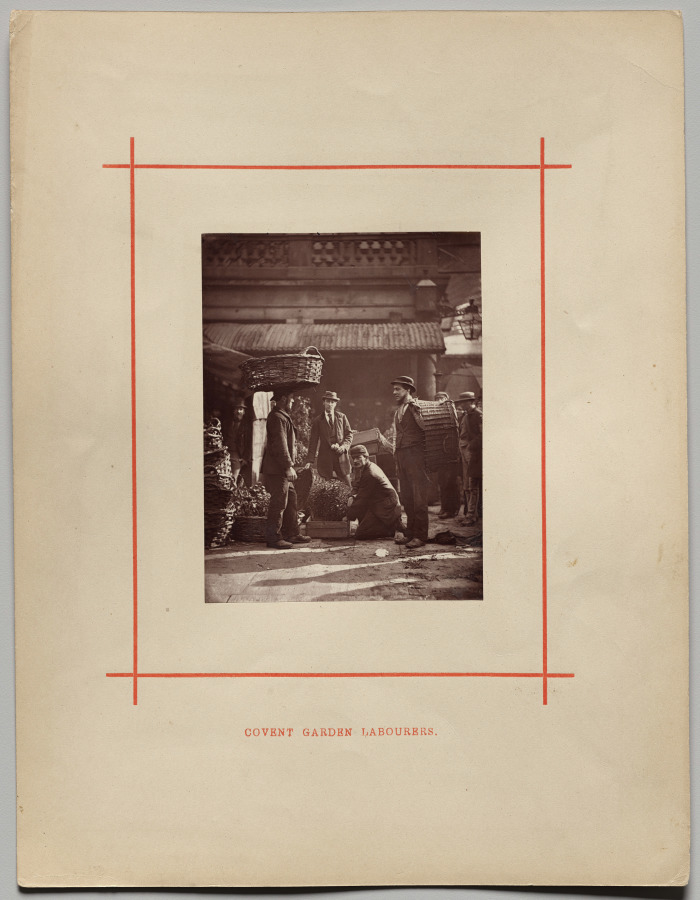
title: Covent Garden Labourers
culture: England, 19th century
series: Street Life in London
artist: John Thomson (Scottish, 1837–1921)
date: 1877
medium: woodburytype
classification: Photograph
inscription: Stamped in red ink on recto of mount: “COVENT GARDEN LABOURERS.”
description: Covent Garden workers, whose day started before 5 a.m., were divided into job-workers or odd-men—who were paid for each parcel they delivered and thus received little income in the off-seasons—and a much smaller group of salaried workers who were paid year-round to create arrangements and stock and help run the stalls.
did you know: The wholesale flower market at Covent Garden contained over 500 stands that employed around 4,000 men as growers and deliverymen.